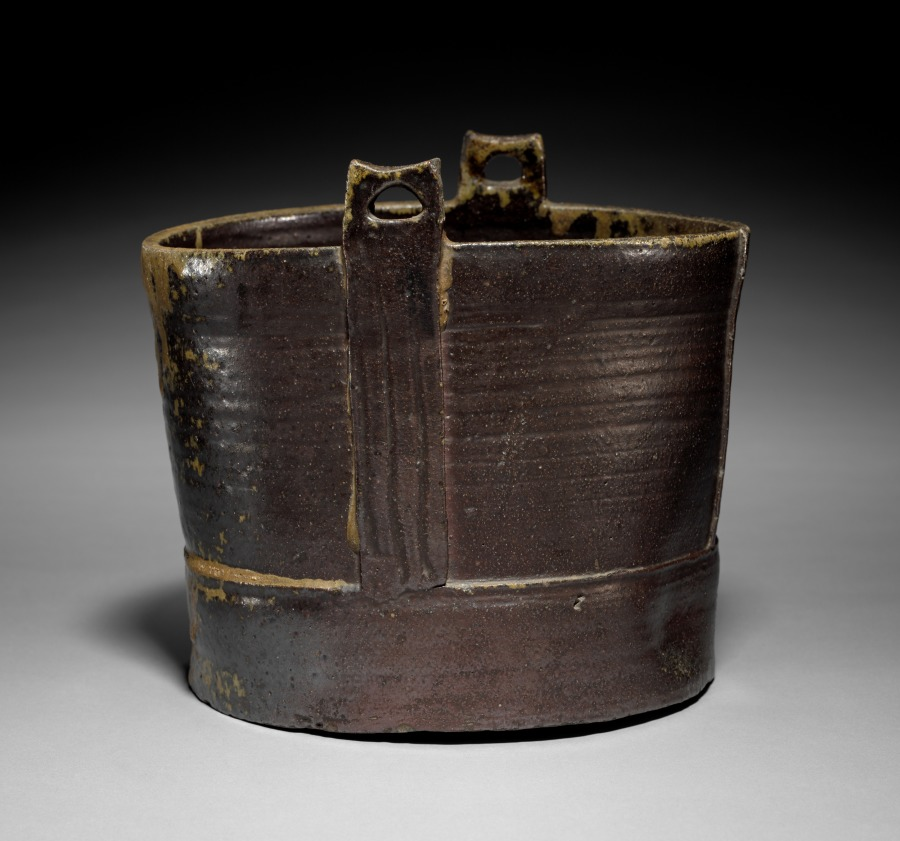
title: Water Container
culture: Japan, Momoyama period (1573–1615)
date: early 1600s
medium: glazed stoneware (Bizen ware, Imbe type)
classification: Ceramic